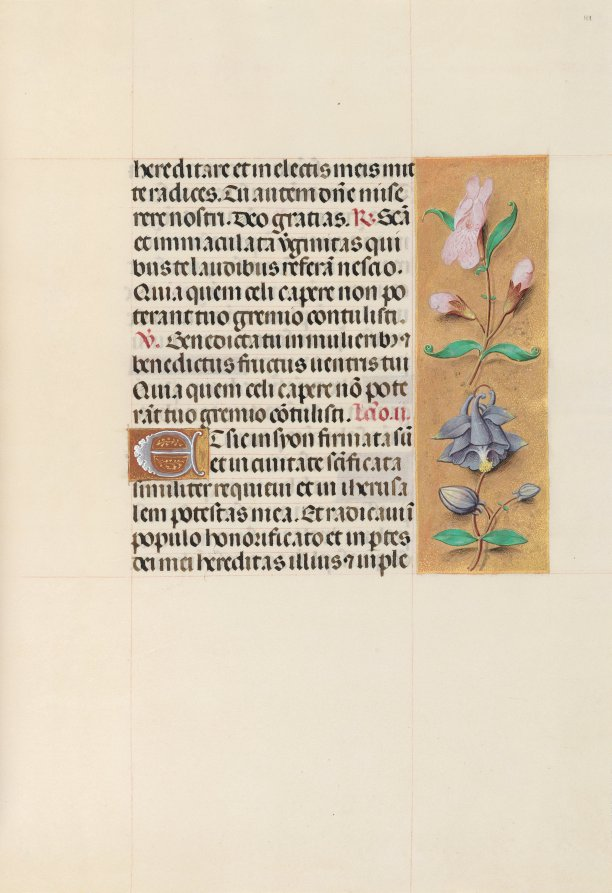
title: Hours of Queen Isabella the Catholic, Queen of Spain: Fol. 111r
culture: Flanders, Ghent and Bruges, late 15th century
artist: Master of the First Prayerbook of Maximillian (Flemish, c. 1444–1519)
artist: and Associates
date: c. 1500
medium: ink, tempera, and gold on vellum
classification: Bound Volume